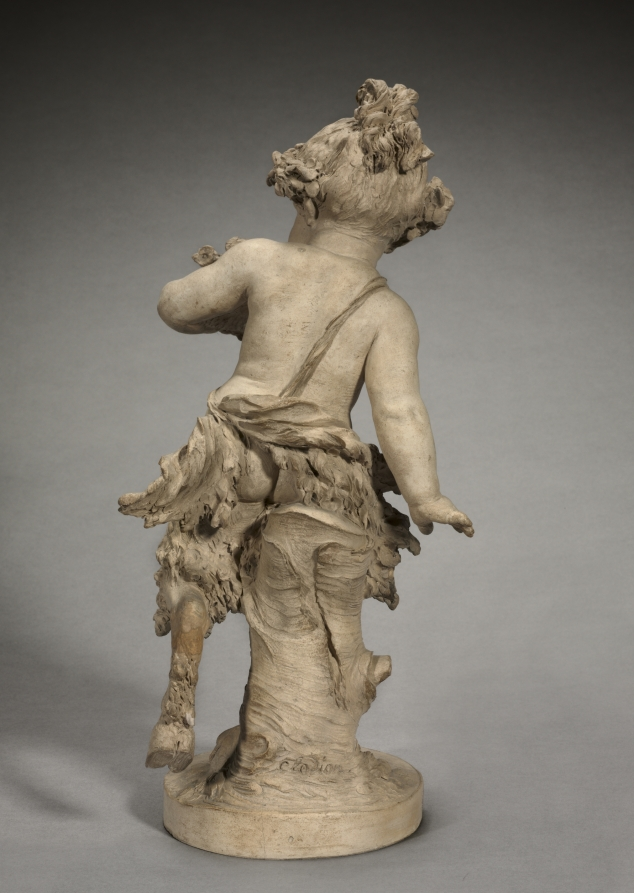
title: Young Satyress Running with an Owl's Nest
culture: France, 18th century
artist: Clodion (French, 1738–1814)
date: 1770s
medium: terracotta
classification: Sculpture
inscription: signature incised on back: CLODION.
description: These works by French sculptor Claude Michel, known as Clodion (1738–1814), shows a pair of young satyrs. Clodion was fond of depicting characters from classical antiquity in his work, and the subject of child or baby satyrs in Bacchanalian celebrations appear often in the work of Rococo artists. The female satyr wraps a plump arm around a nest filled with baby birds, while her male counterpart holds an owl. Balancing on one foot, the two flee the scene of their theft.